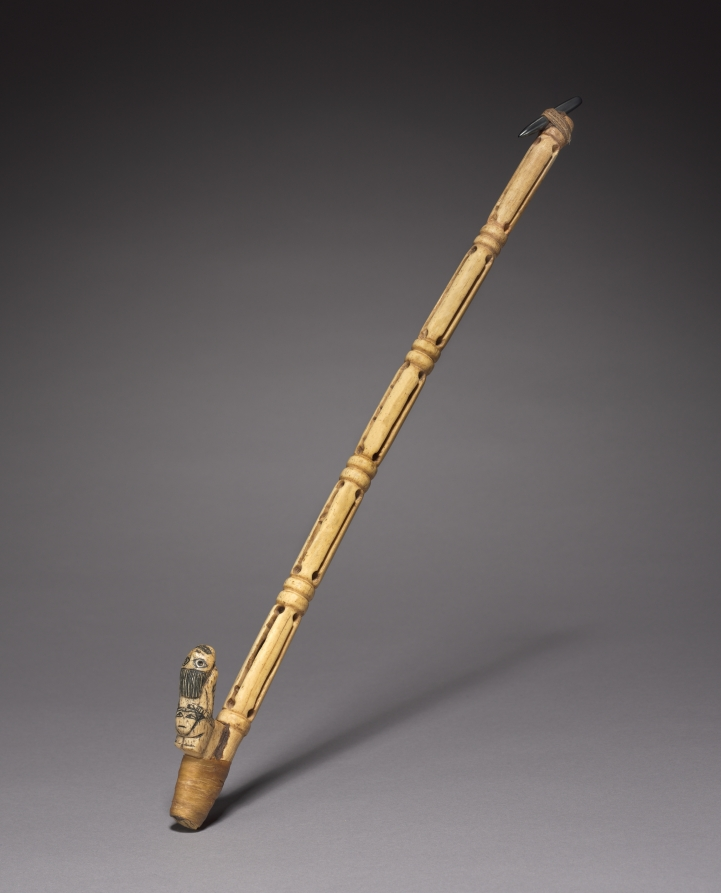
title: Spear Thrower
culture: Peru, South Coast, late Paracas or early Nasca style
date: 200 BCE–200 CE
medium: bone, hematite, cotton thread, sinew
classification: Arms and Armor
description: Spear throwers improve a spear's range and thrust. The spear was placed against the stone pivot and hurled using the thumb rest, carved as a figure with a skeletal chest, back-bent head, and a severed human head at its rear. This figure, frequent in art, is not well understood, but its appearance here suggests a connection to death. The shaft's carving makes clever use of the bone's marrow cavity.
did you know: Spear throwers, also called atlatls, use leverage to propel a spear faster and farther through the air.